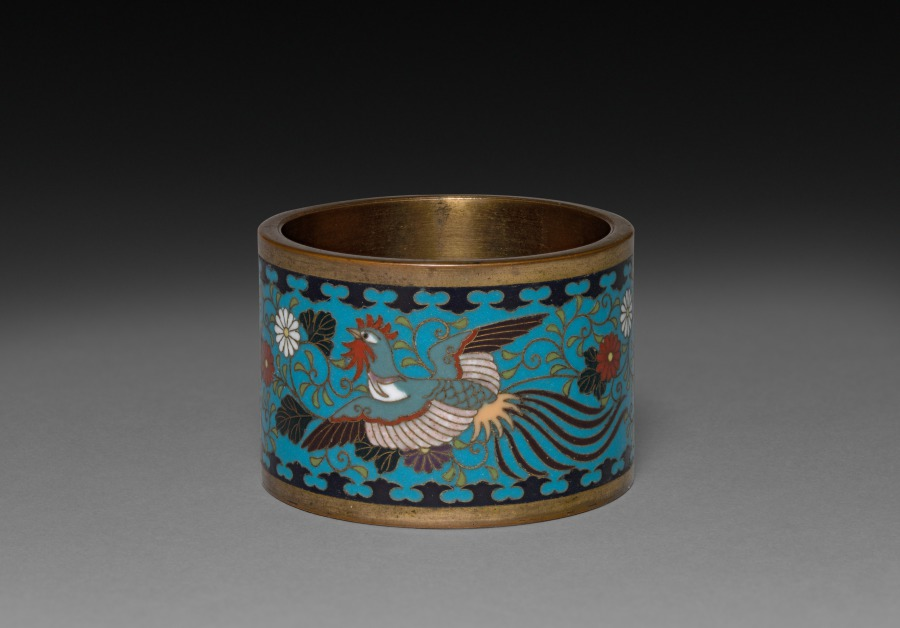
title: Napkin Ring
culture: Japan, Meiji period (1868–1912) to Taishō period (1912–26)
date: early 1900s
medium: one of a pair; cloisonne enamel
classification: Enamel